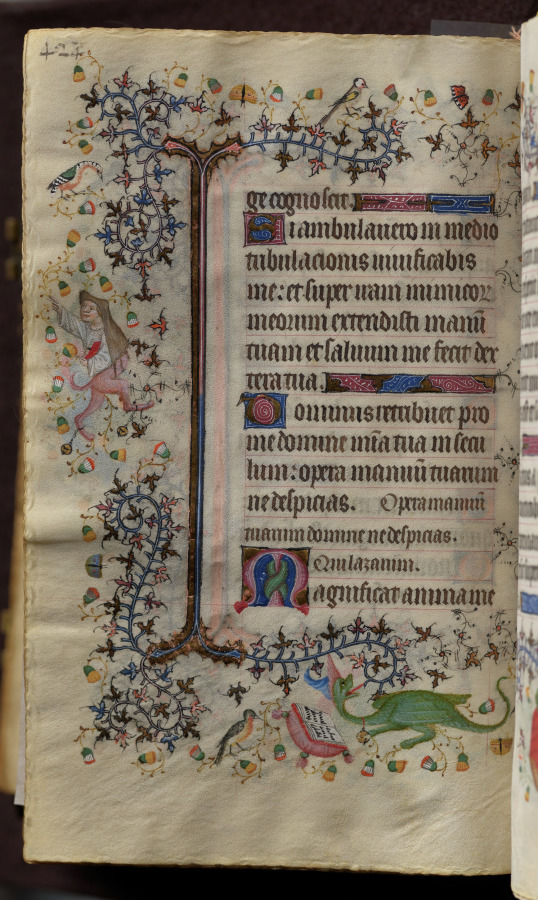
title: Hours of Charles the Noble, King of Navarre (1361-1425): fol. 206v, Text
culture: France, Paris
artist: Master of the Brussels Initials and Associates (French)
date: c. 1405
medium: ink, tempera, and gold on vellum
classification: Bound Volume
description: This precious volume was obviously highly prized by its owner, the French-born King of Navarre, who had his coat of arms painted on no less than twenty folios. Rather than directly commissioning this manuscript from a specific workshop, it seems that Charles the Noble acquired his book of hours -- perhaps ready-made for the luxury market -- while on a trip to Paris in 1404-05. A collaborative effort, six painting styles are evidenced within the pages of this codex, those of two Italians, two Frenchmen, and two Netherlanders. The painter who was responsible for the planning and decoration of the book, and who produced seventeen of the large miniatures, was a Bolognese artist known as the Master of the Brussels Initials. His principal assistant, responsible for most of the borders, was a Florentine who signed his name "Zecho" da Firenze on folio 208 verso.